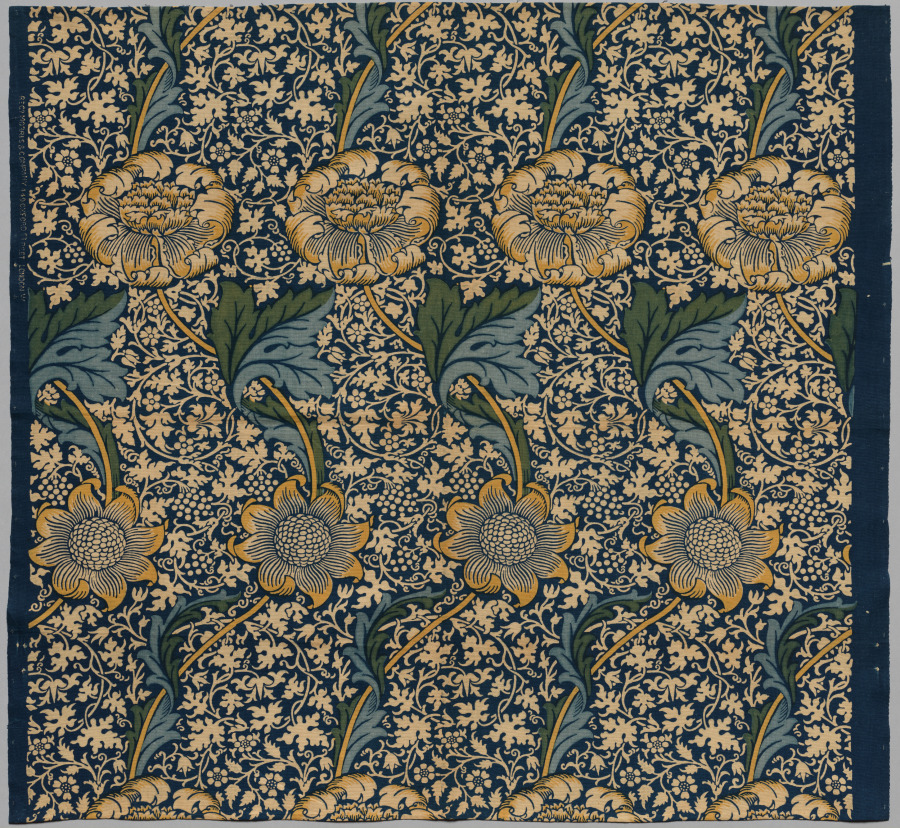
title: Kennet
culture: England, Merton Abbey, 20th century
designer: William Morris (British, 1834–1896)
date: c 1920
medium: plain weave cotton, printed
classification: Textile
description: Morris said that he used the South Kensington Museum (now the Victoria & Albert Museum) more than anyone alive. As one of the most knowledgeable textile historians of his day, Morris filtered his love of nature through the lens of history. Later textiles with strong diagonal orientation, such as Kennet, show a debt to the centuries-old Italian cut velvet that he had studied. Named after a river in the south of England that flows into the Thames, Kennet is an example of one of his patterns that could be purchased in a variety of colors and fabrics, including cotton, velveteen, silk, and Madras muslin, creating limitless possibilities to appeal to consumers’ needs and tastes.